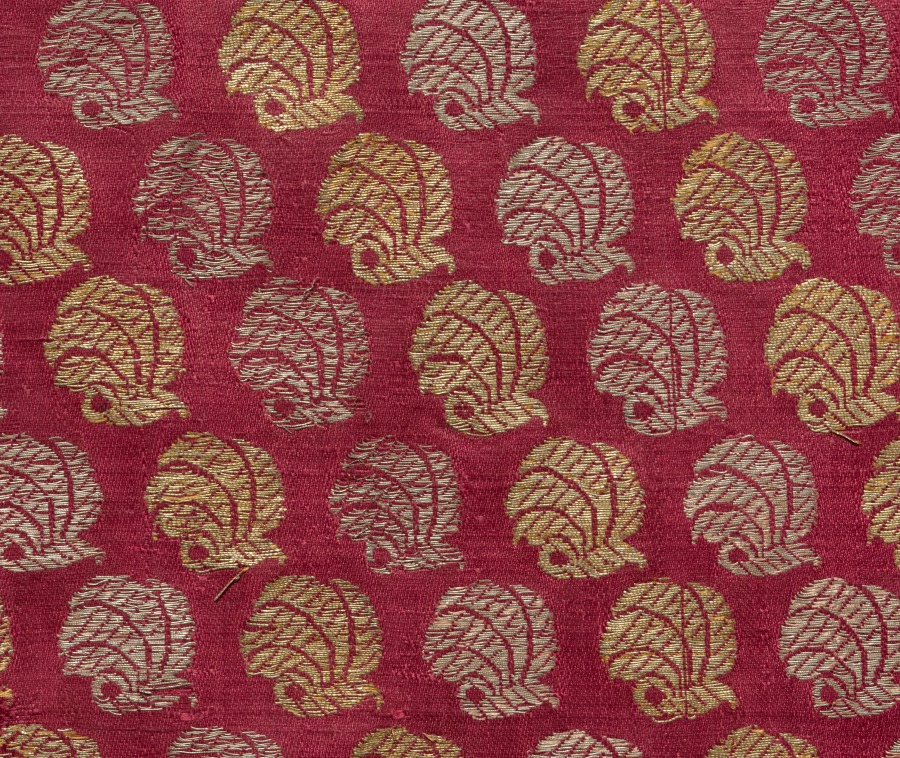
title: Fragment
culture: India, Benares ?, 19th century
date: 1800s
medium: brocade; silk, gold and silver threads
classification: Textile